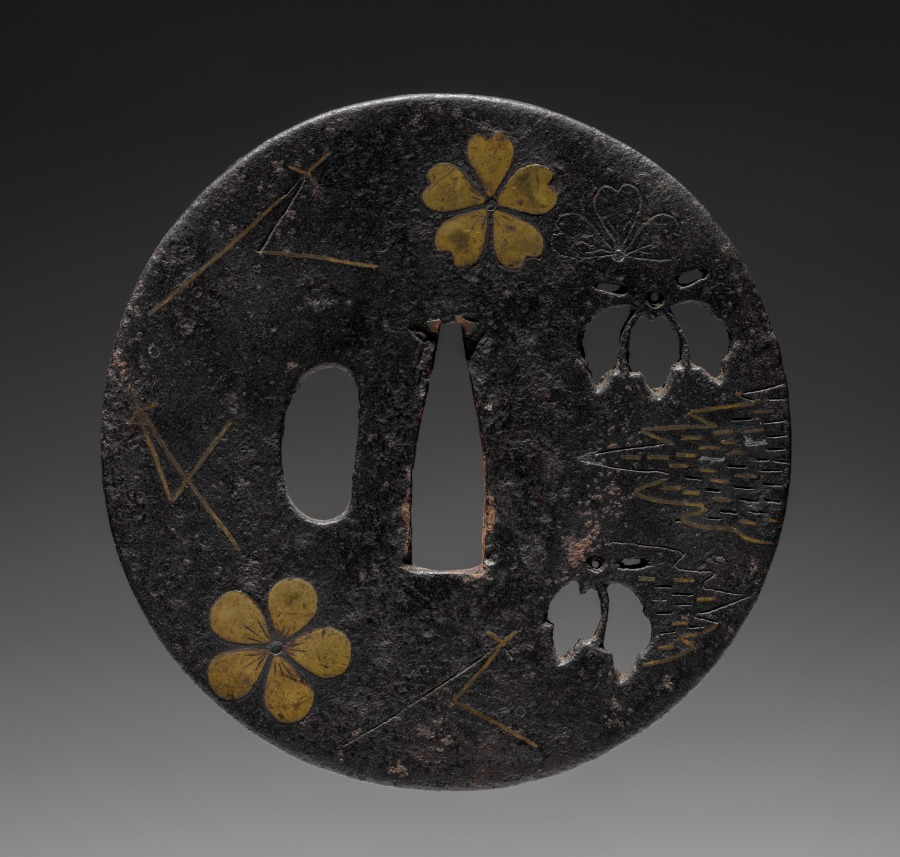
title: Sword Guard (Tsuba)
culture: Japan, possibly Edo period (1615-1868)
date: c. 1615–1868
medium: iron witih brass inlay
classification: Arms and Armor